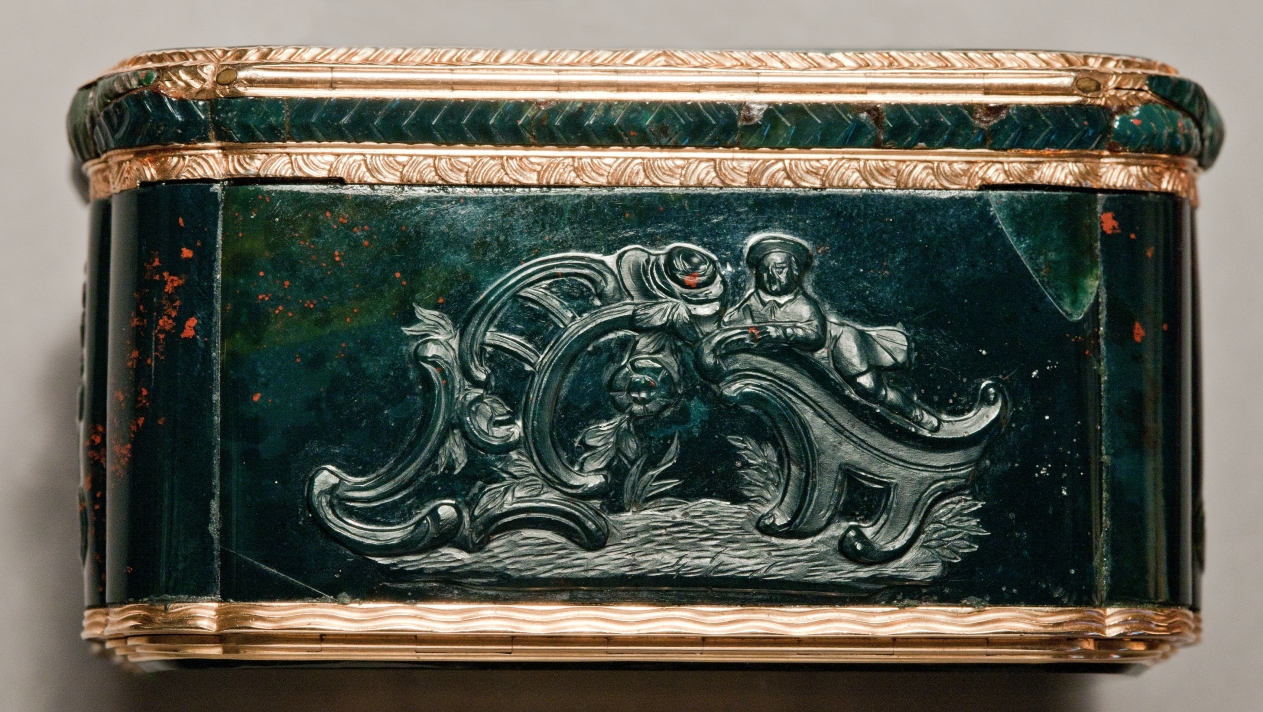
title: Snuff Box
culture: Germany, Berlin, mid-18th century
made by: attributed to Johannes George Klette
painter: Carl Gustav Klingstedt (Swedish, 1657–1734)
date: c. 1750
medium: gold-mounted carved bloodstone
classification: Miscellaneous